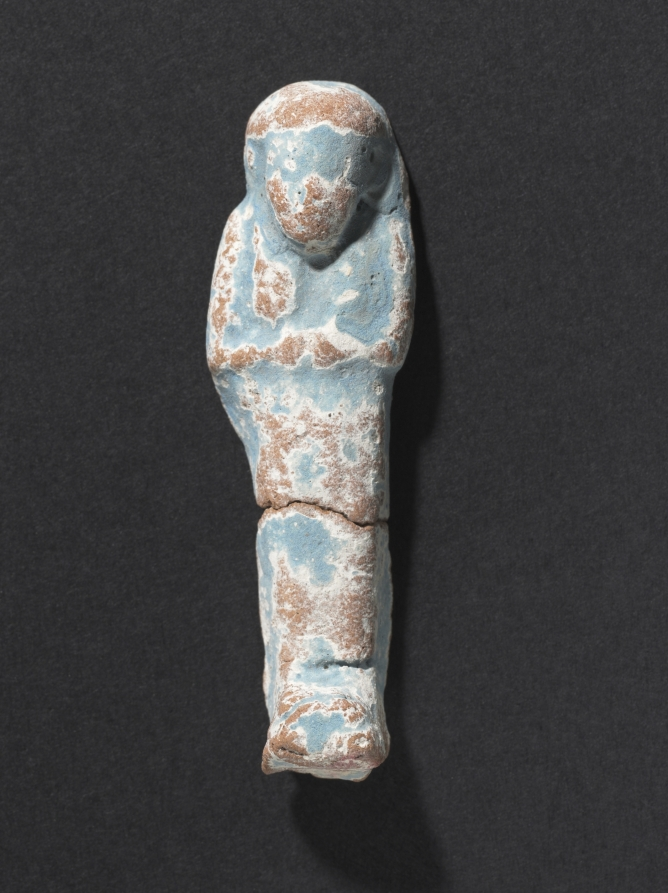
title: Shawabty of Ditamenpaankh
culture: Egypt, Late period (715–332 BCE), Dynasty 25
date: 715–656 BCE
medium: terracotta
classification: Funerary Equipment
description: High demand for shawabtys in the Late Period, a time when as many as 400 or more shawabtys were placed in the tomb with the deceased, gave rise to a specialized container for storing them: the shawabty box. This example is inscribed for the lady of the house, Ditamenpaankh, and was probably one of a pair originally made for her. The single-masted boat on the box’s lid is perhaps an allusion to the pilgrimage of the deceased to the holy city of Abydos, the cult city of Osiris, king of the dead. The shawabtys inside are crude, mass-produced examples cast in an open mold. Made of terracotta, their blue paint imitates more costly shawabtys made of faience. As for the shawabty spell, it has been removed from its traditional location on the shawabty’s front and relocated onto the sides of box, where it needed only to be written once, thus expediting production.